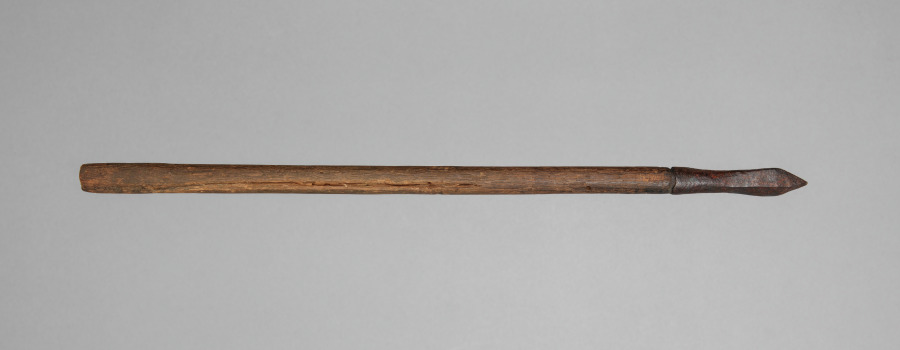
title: Crossbow Bolt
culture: Germany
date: 1600s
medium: wood (flights missing) and steel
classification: Arms and Armor